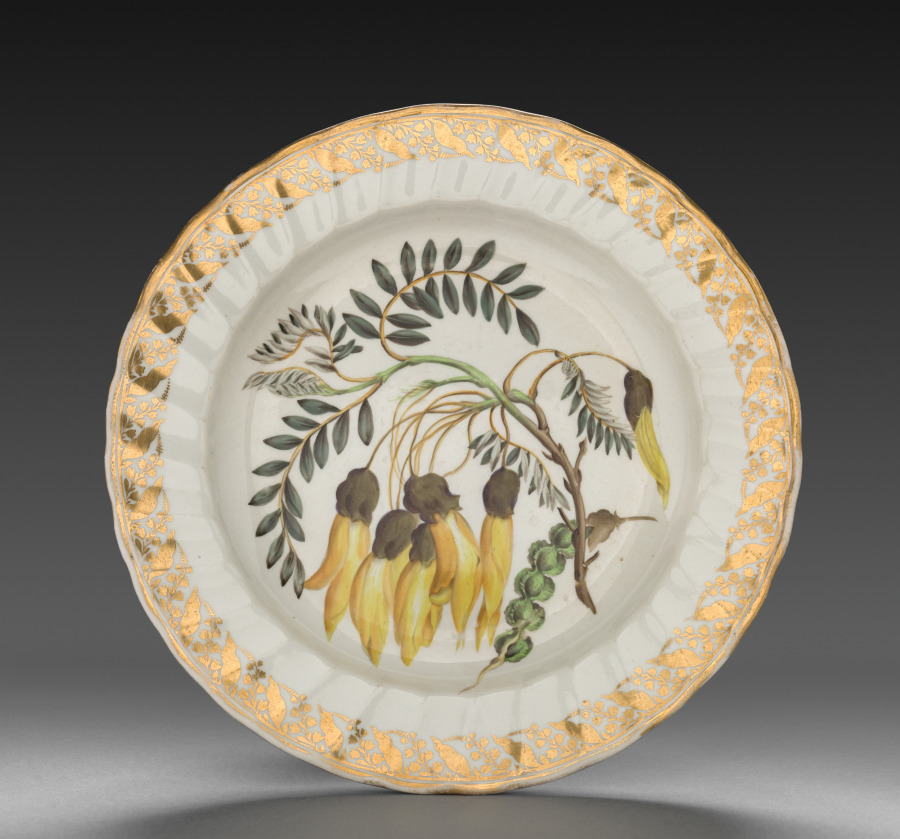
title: Plate from Dessert Service: Winged Podded Sophora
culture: England, Derby, 18th century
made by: Derby (Crown Derby Period) (British)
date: c. 1800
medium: porcelain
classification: Ceramic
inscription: inscribed in blue on back: Sophora Tetrapteria./Winged Podded Saphora./crown/crossed batons and dots/D/115.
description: Each dish is decorated with recognizable plants, the names of which are inscribed on the base in both Latin and English. Identifying the blossoms only became customary in the late 18th century when a single piece of porcelain was decorated with one species, and flowers were represented along with leaves, stems, seed pods, and roots. All of this reflects Carolus Linnaeus’s recent invention of a scientific method to categorize all known flora. The decorations on the Derby factory’s products derive from contemporary English botanical publications. For instance, illustrations in William Curtis’s The Botanical Magazine served as models for the French marigold and nettle-leaved bell flower on the dessert service.